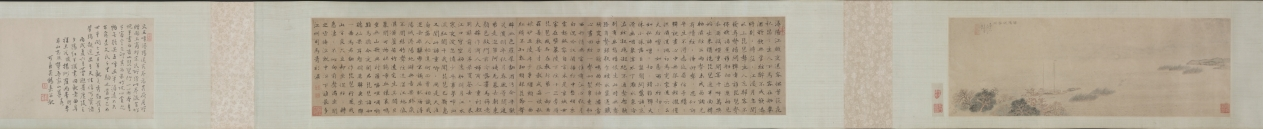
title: Saying Farewell at Xunyang (Song of the Pipa)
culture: China, Ming dynasty (1368–1644)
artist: Wen Boren (Chinese, 1502–1575)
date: 1500s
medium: handscroll, ink and color on paper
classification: Painting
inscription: "潯陽送客圖" 五峰山人文伯仁寫于停雲館中 [印] 文伯仁; 五峰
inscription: 2 colophons and 9 additional seals: 1 transcription of "Pipa xing 琵琶行” (Song of Pipa) and 3 seals of Zhu Yizun 朱彜尊 (1629-1709); 2 seals of Wu Rongguang 吳榮光 (1773-1843); 1 colophon, dated 1826, and 3 seals of Wu Xijia 吳錫嘉 (mid-1700s)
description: This handscroll depicts The Song of the Pipa, a poem by Bai Juyi 白居易 (772–846) written after the poet’s encounter with a pipa player on the Yangzi River. Expelled from her home city when her beauty and fame had faded, she played for the poet at night. Her musical performance and tragic life story resonated with Bai Juyi, who had just been demoted and exiled from life at court himself. The hazy, vast view and pale color tonalities of this painting illustrate these feelings of endless sadness, having lost one’s sense of purpose in life.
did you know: Wen Boren depicted the chilly autumn water with a fishnet pattern.